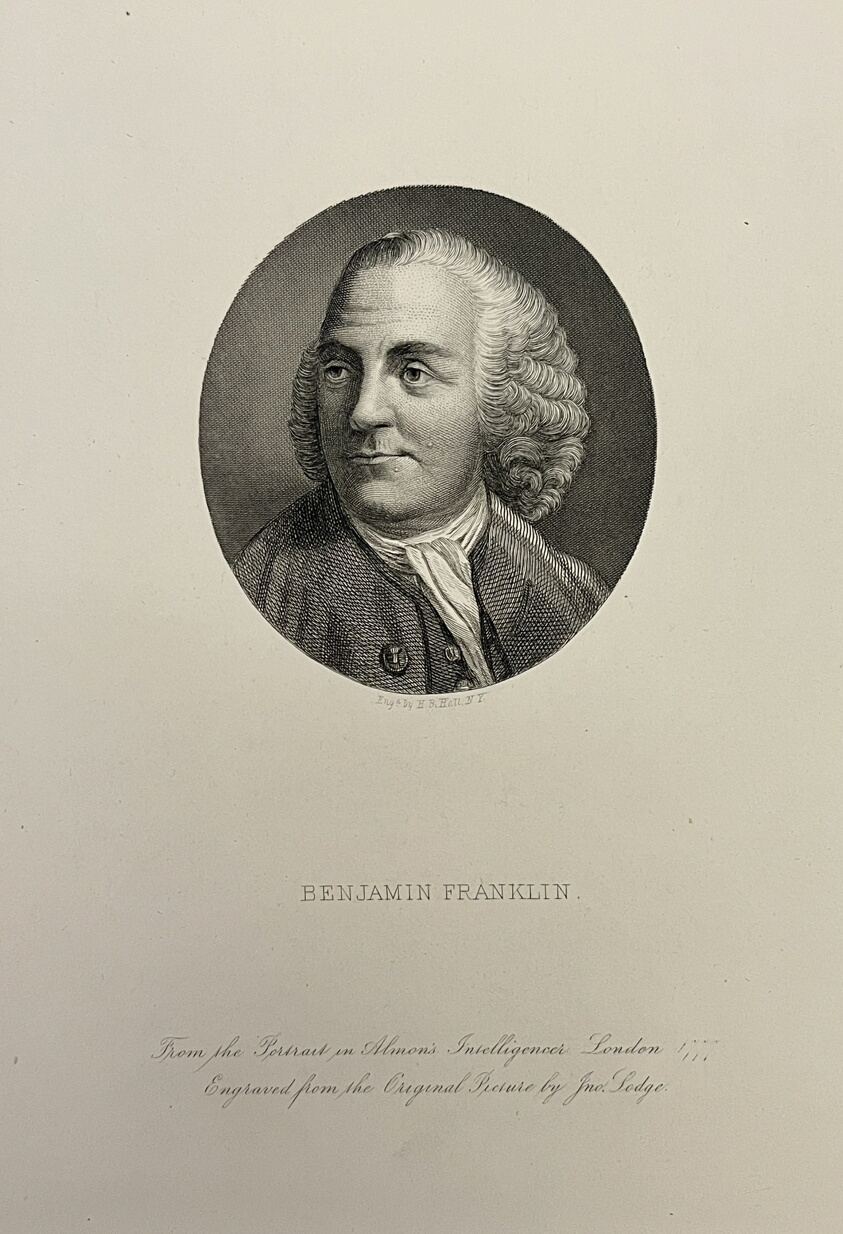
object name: Print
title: Benjamin Franklin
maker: Henry Bryan Hall (American, 1808-1884); after John Lodge (British, active from 1782-died 1796)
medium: Steel engraving on paper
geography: United States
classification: reproduction; print; prints and drawing